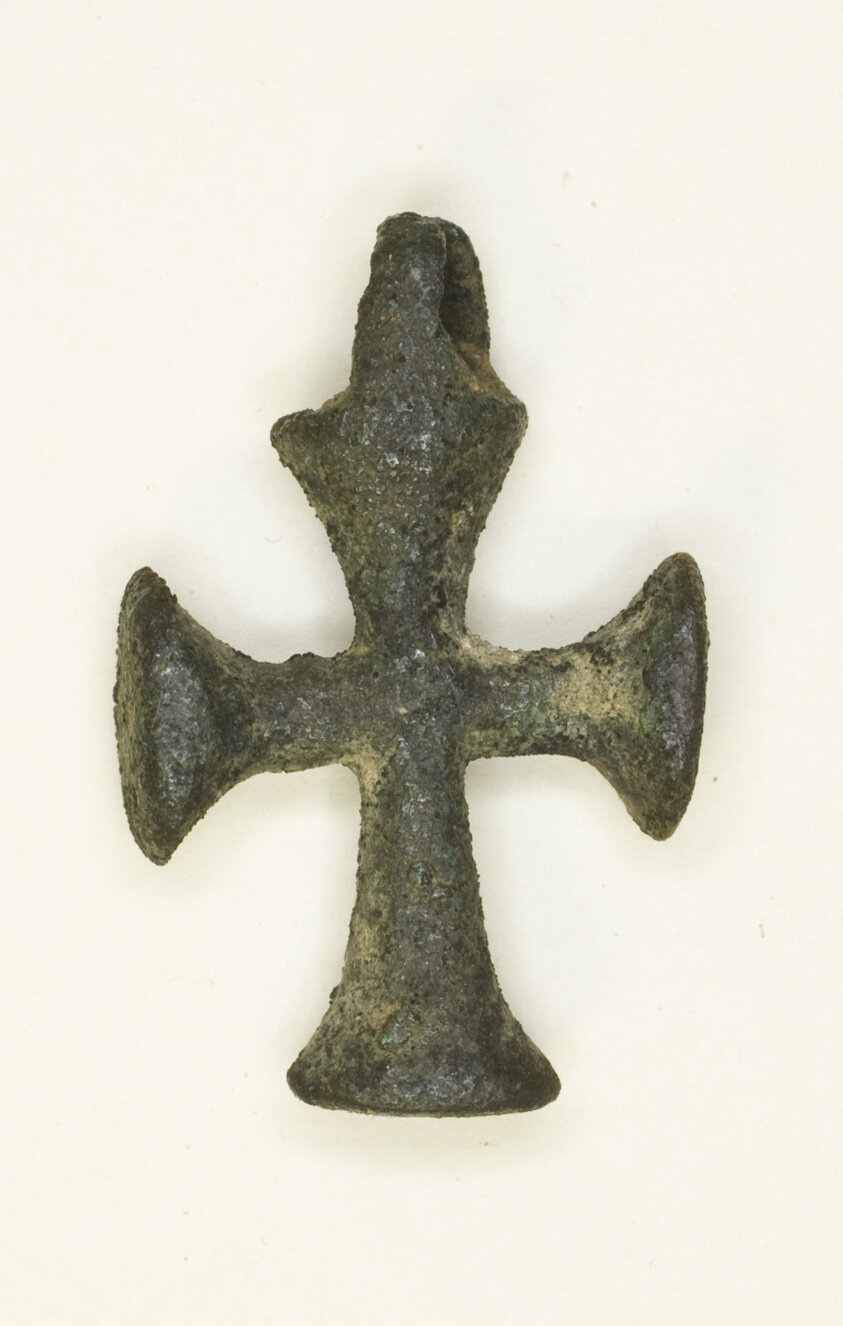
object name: Costume and Accessories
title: Amulet of a Cross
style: coptic (period)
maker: Egyptian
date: Byzantine Period (4th–6th century)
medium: Bronze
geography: Egypt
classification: bronze; jewelry; metal; amulet; ancient art; costume